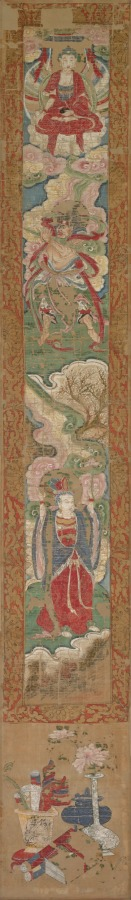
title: Buddhist Panel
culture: China or Korea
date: 1600s–1700s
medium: Hanging scroll; ink and color on paper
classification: Painting